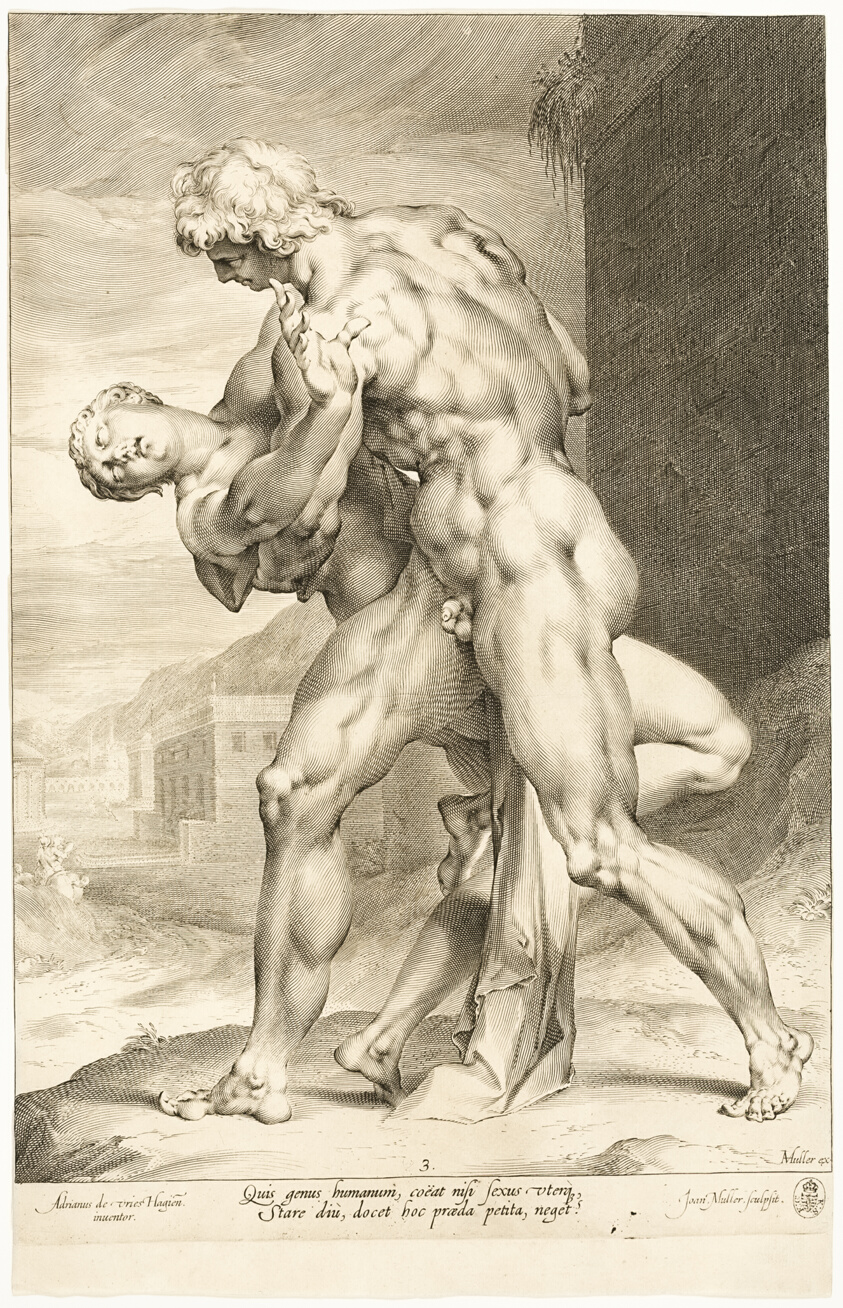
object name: Print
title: The Rape of a Sabine Woman, Lateral View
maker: Jan Harmensz Muller (Dutch, 1571-1628); after Adriaen de Vries (Dutch, c. 1545-1626)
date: c. 1598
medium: Engraving on paper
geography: Netherlands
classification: engraving; print; prints and drawing